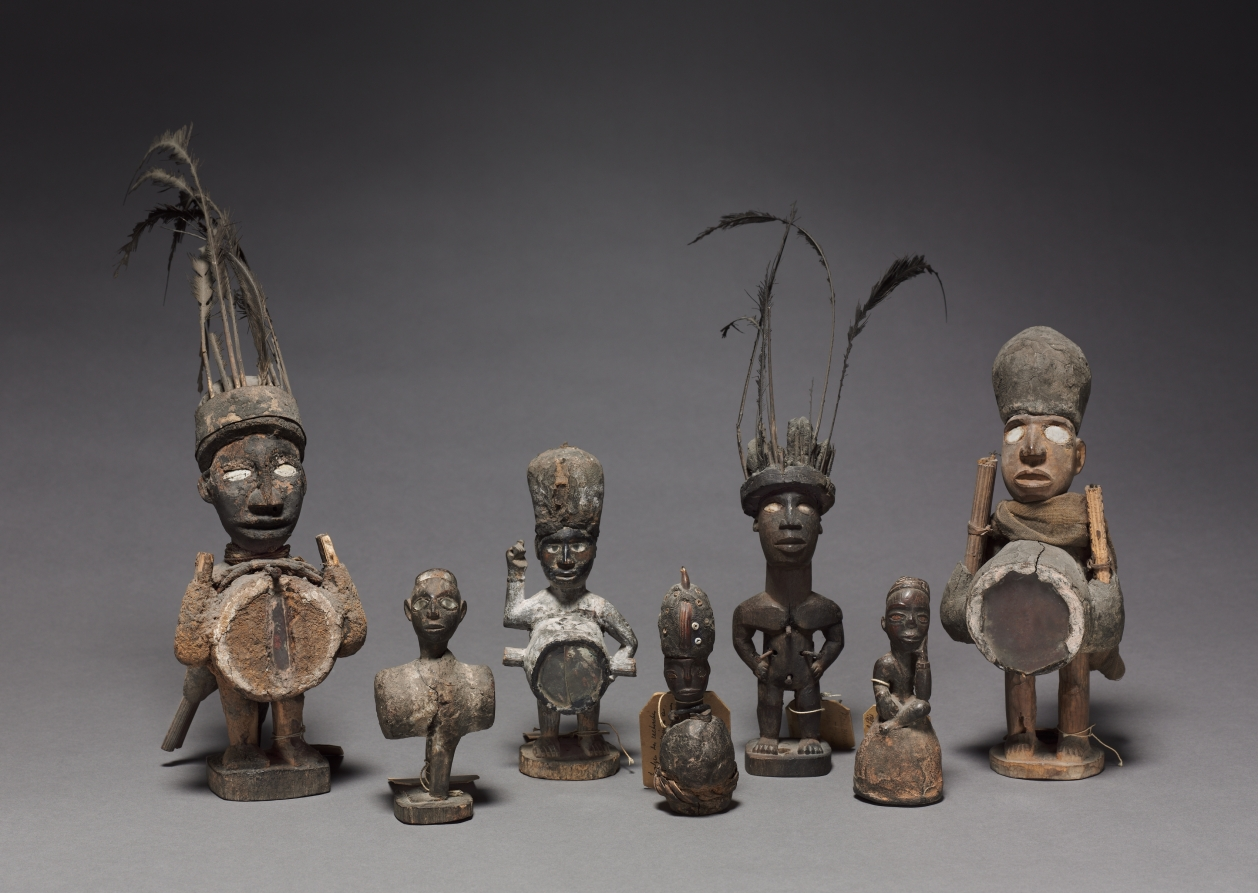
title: Power figure (nkisi)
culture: Africa, Central Africa, Republic of the Congo, Kongo-style maker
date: late 1800s-early 1900s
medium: Wood, metalized glass, organic materials (including resin), feathers, plant fibers, iron, and copper alloy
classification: Sculpture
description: One of seven minkisi figures previously in the René and Odette Delenne collection, this object contained medicines in which an ancestral spirit was believed to reside. This figure is one of the two tallest in the collection. Feathers of a bird of prey adorn its head, with two small guns pointing upward and a third hanging down. It had belonged to “the sorcerer of Louboulou.”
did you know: This is one of two tallest in the collection of spiritual figurines loaded with gunpowder to shoot at witches: nduda, or “night guns.”